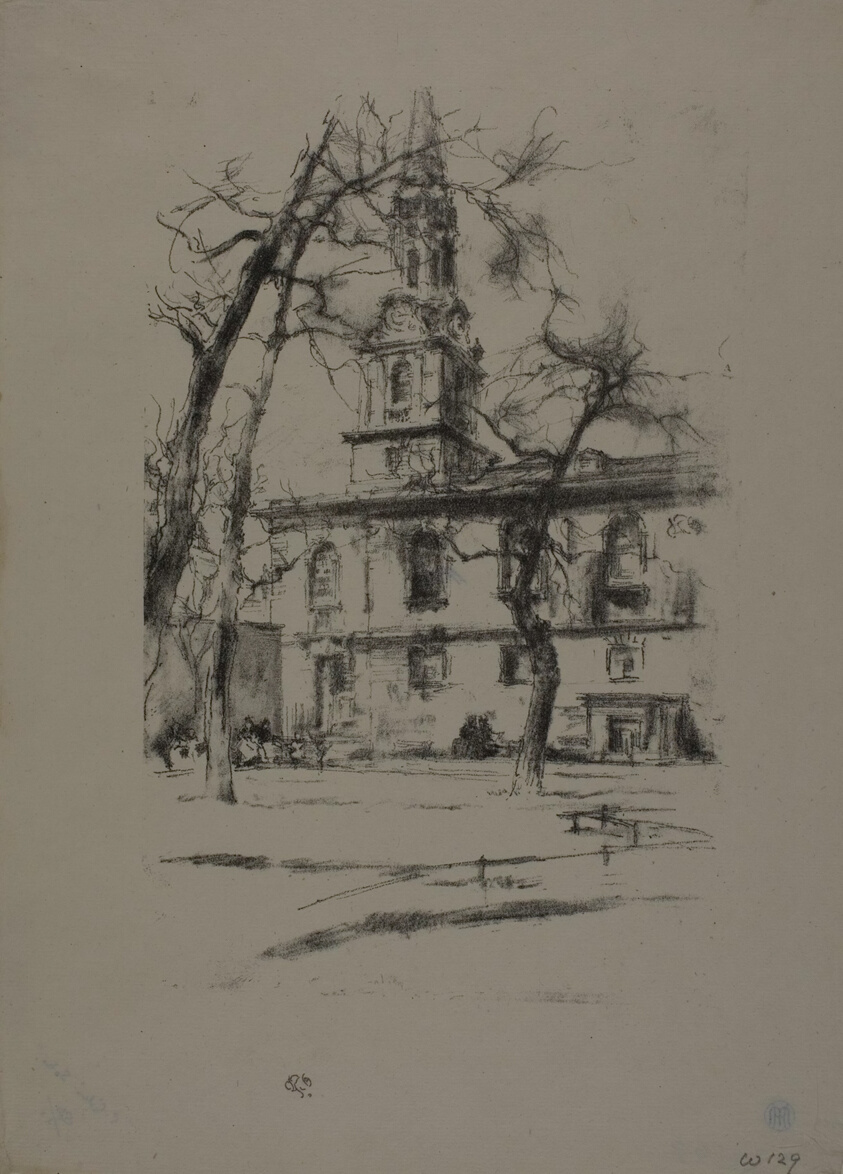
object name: Print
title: St. Giles-in-the-Fields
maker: James McNeill Whistler (American, 1834-1903)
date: 1896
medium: Transfer lithograph in black with stumping, on cream laid paper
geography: United States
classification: transfer lithograph; lithograph; print; prints and drawing; paper